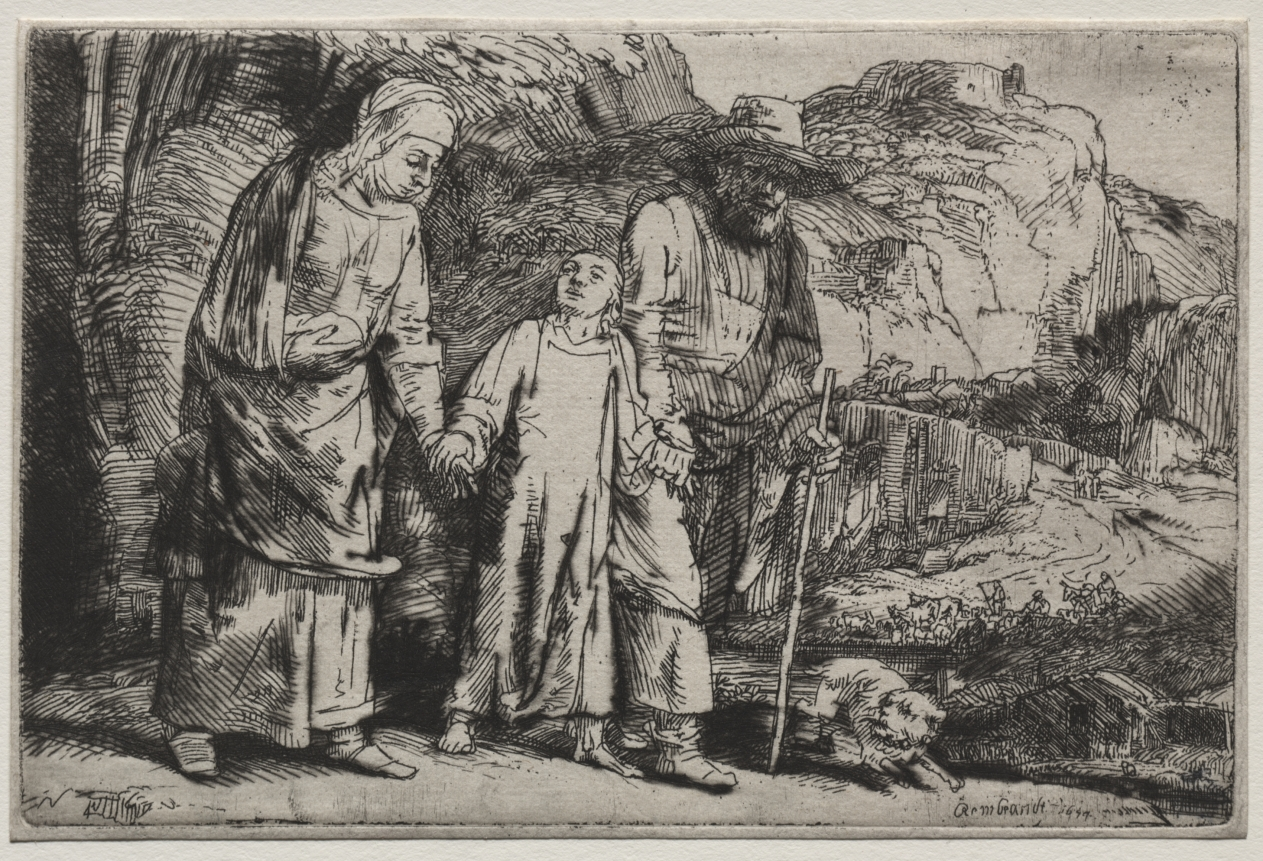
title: Christ Returning from the Temple with His Parents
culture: Netherlands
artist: Rembrandt van Rijn (Dutch, 1606–1669)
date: 1654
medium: etching and drypoint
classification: Print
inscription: lower right, in plate: Rembrandt [f.?]1654 ; VERSO, upper center, in red chalk: 1[circled] ; upper center, in graphite; B 60 ; lower left, in graphite: B 60 ; lower center, in graphite: very fine ; lower center, in graphite: Hind 278 ; lower center, in graphite: Coll. Lichtenstein ; lower right, in graphite: 21 ; lower right, in graphite: BR[Cz?] O